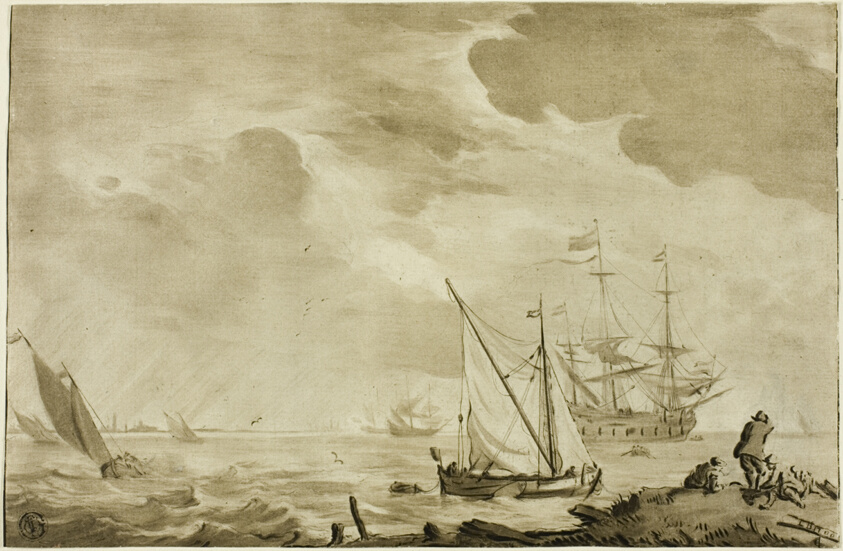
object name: Drawing and Watercolor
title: Seascape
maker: Jacob Cornelis Ploos van Amstel (Dutch, 1726-1798); or after Ludolf van Bakhuyzen (Dutch, 18th century)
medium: Pen and wash on paper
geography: Netherlands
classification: ink or chalk wash; drawings (visual works); prints and drawing